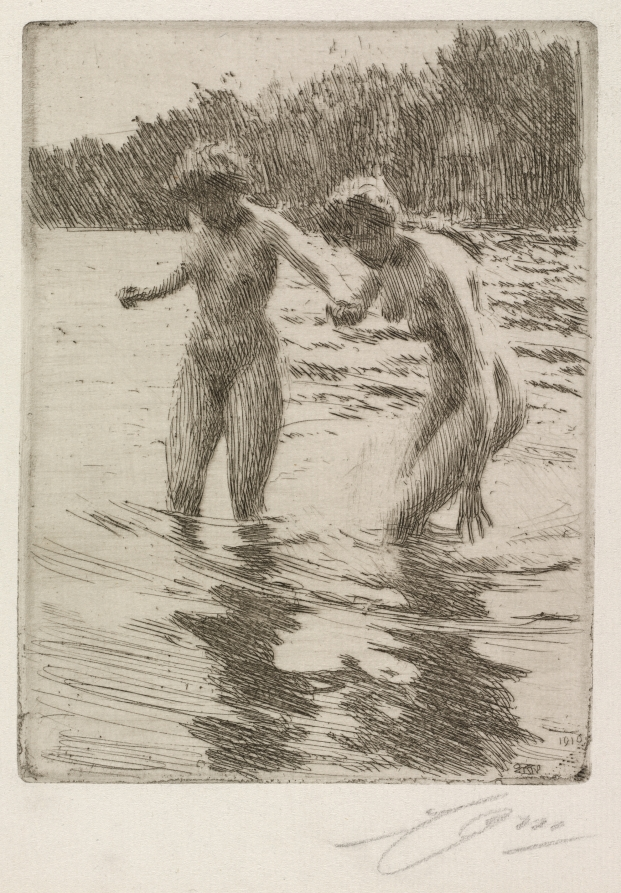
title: Two Bathers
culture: Sweden, 20th century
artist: Anders Zorn (Swedish, 1860–1920)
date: 1910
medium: etching, drypoint and roulette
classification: Print